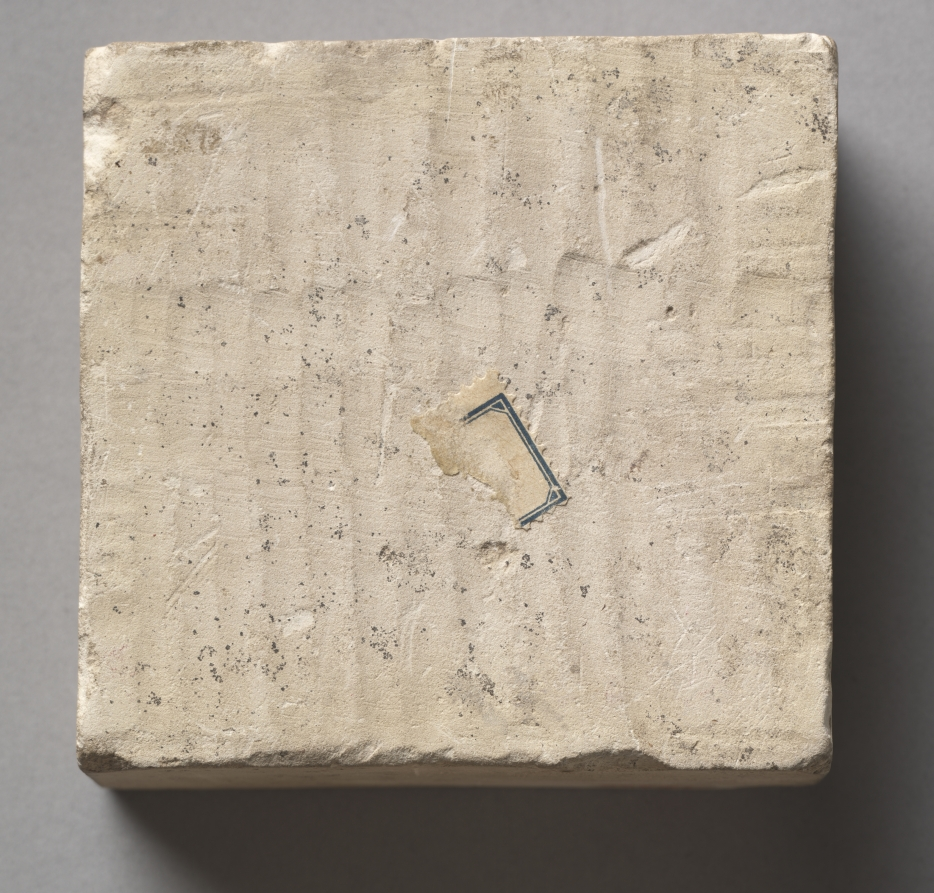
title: Mold in Two Parts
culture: Egypt, Greco-Roman period (332 BCE–395 CE), Ptolemaic dynasty (305–30 BCE) or later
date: 305–30 BCE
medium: limestone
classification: Sculpture